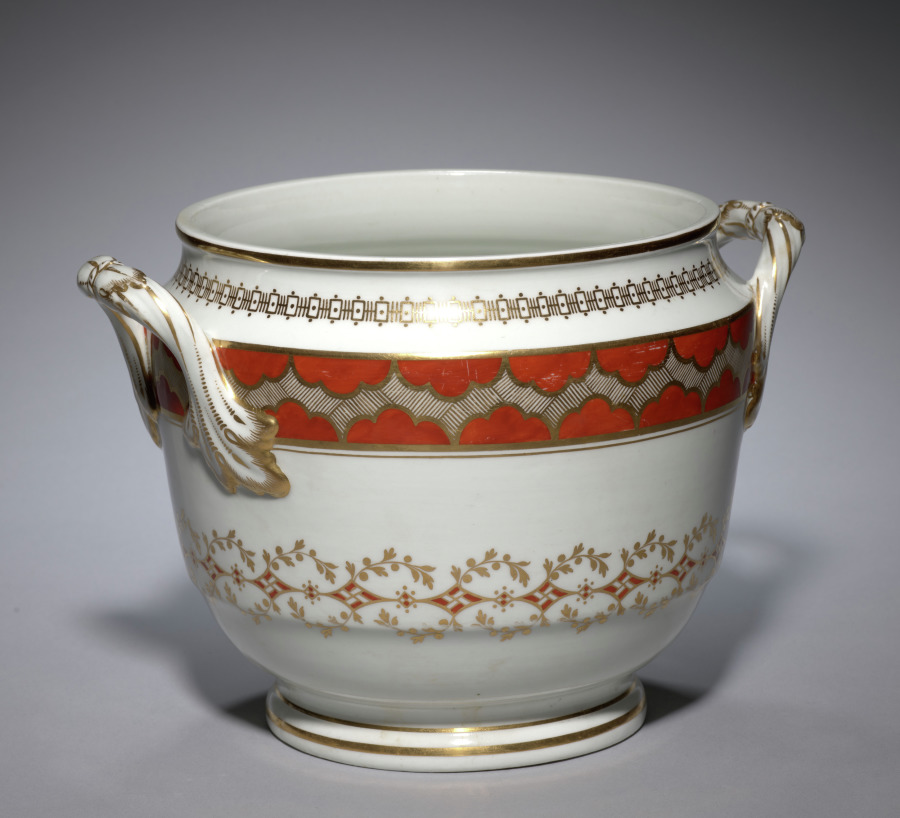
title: Ice Pail (2 of 2)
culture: England, late 18th-early 19th Century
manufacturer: Flight & Barr (British)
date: c. 1792–1804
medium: porcelain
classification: Ceramic